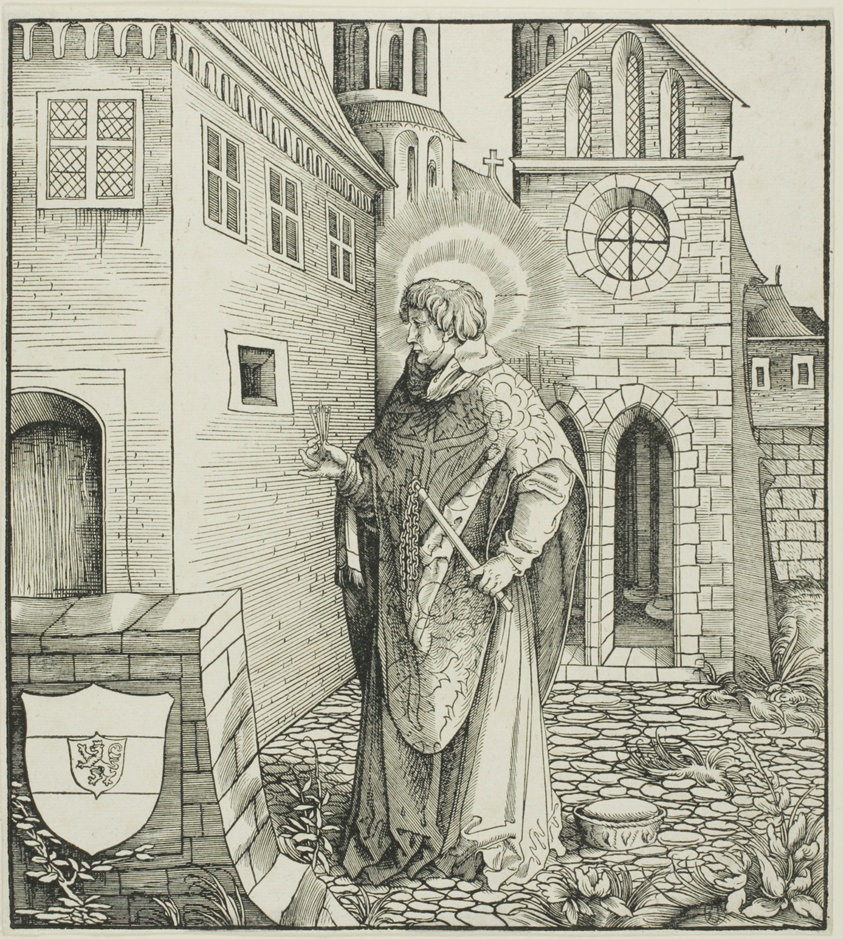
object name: Print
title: Saint Ferreolus, from Saints Connected with the House of Habsburg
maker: Leonhard Beck (German, c. 1480-1542); carved by Hans Franck (German, c. 1485-1522)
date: 1517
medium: Woodcut in black on ivory wove paper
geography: Germany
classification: wood engraving; print; prints and drawing